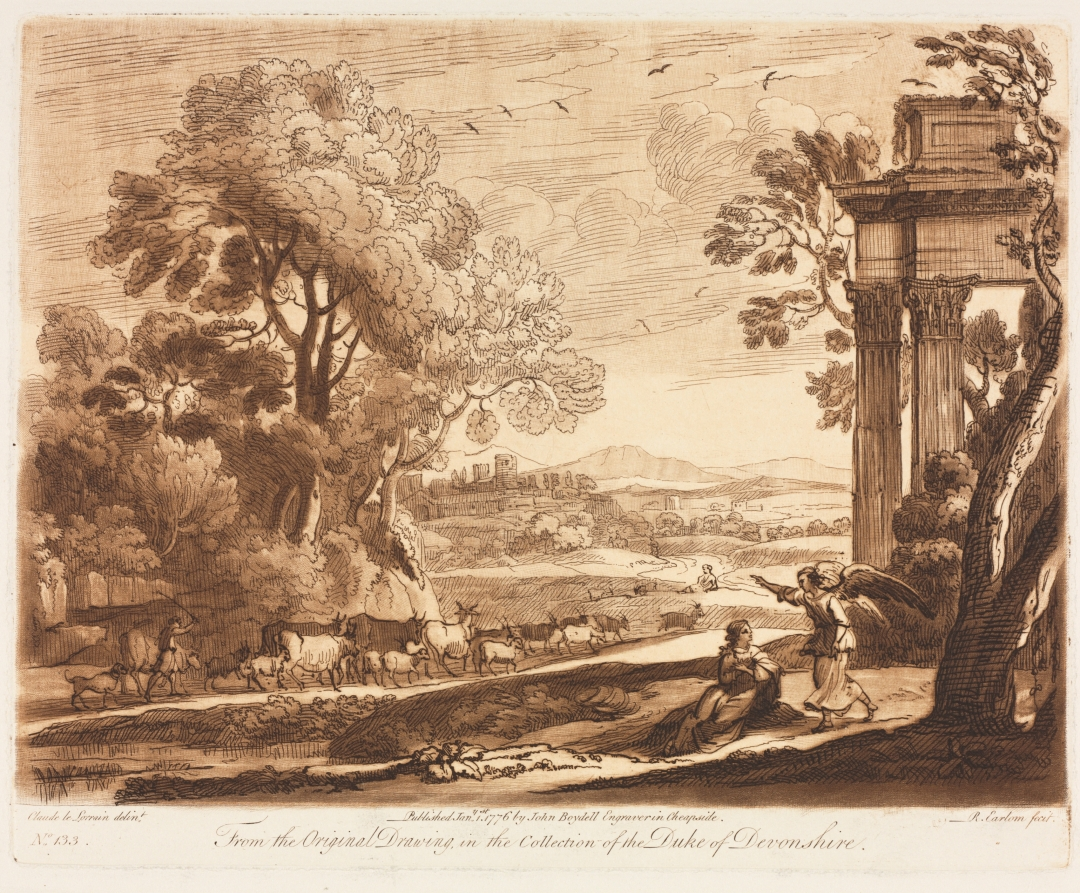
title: Liber Veritatis: No. 133, A Landscape, with Cattle, and the Angel Comforting Hagar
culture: England, 18th century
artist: Richard Earlom (British, 1743–1822)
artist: after Claude Lorrain (French, 1604–1682)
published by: John Boydell (British, 1720–1804)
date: 1776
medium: etching and mezzotint printed in brown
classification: Print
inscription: inscribed lower margin in plate: From the Original Drawing, in the collection of the Duke of Devonshire